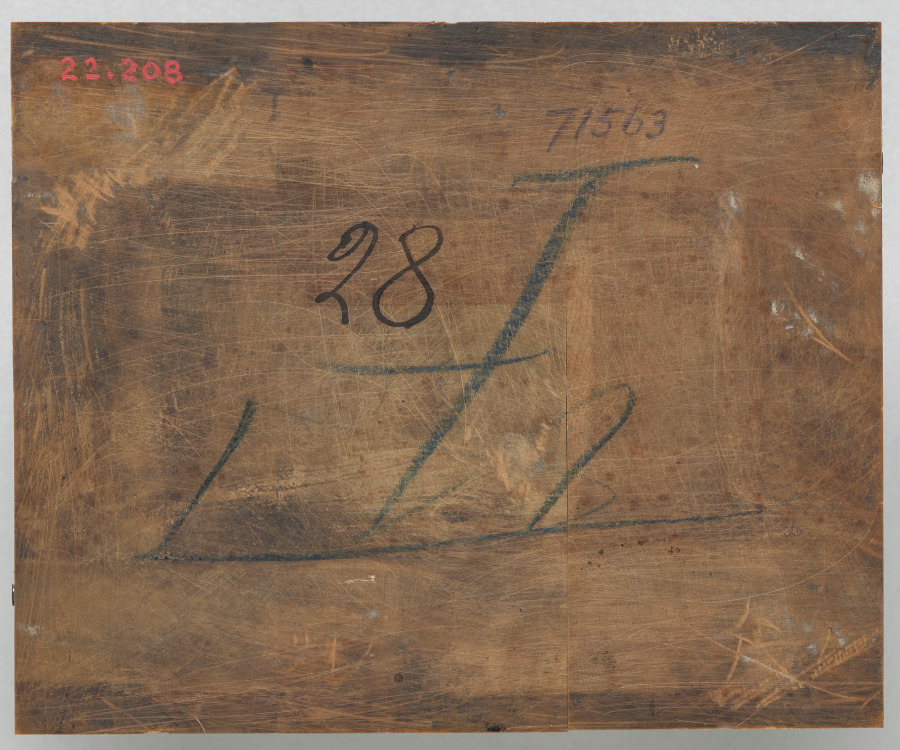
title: Une Chasse à Courre, Mont Gérard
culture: France, 19th-20th century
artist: Auguste Louis Lepère (French, 1849–1918)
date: 1887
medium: woodblock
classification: Woodblock